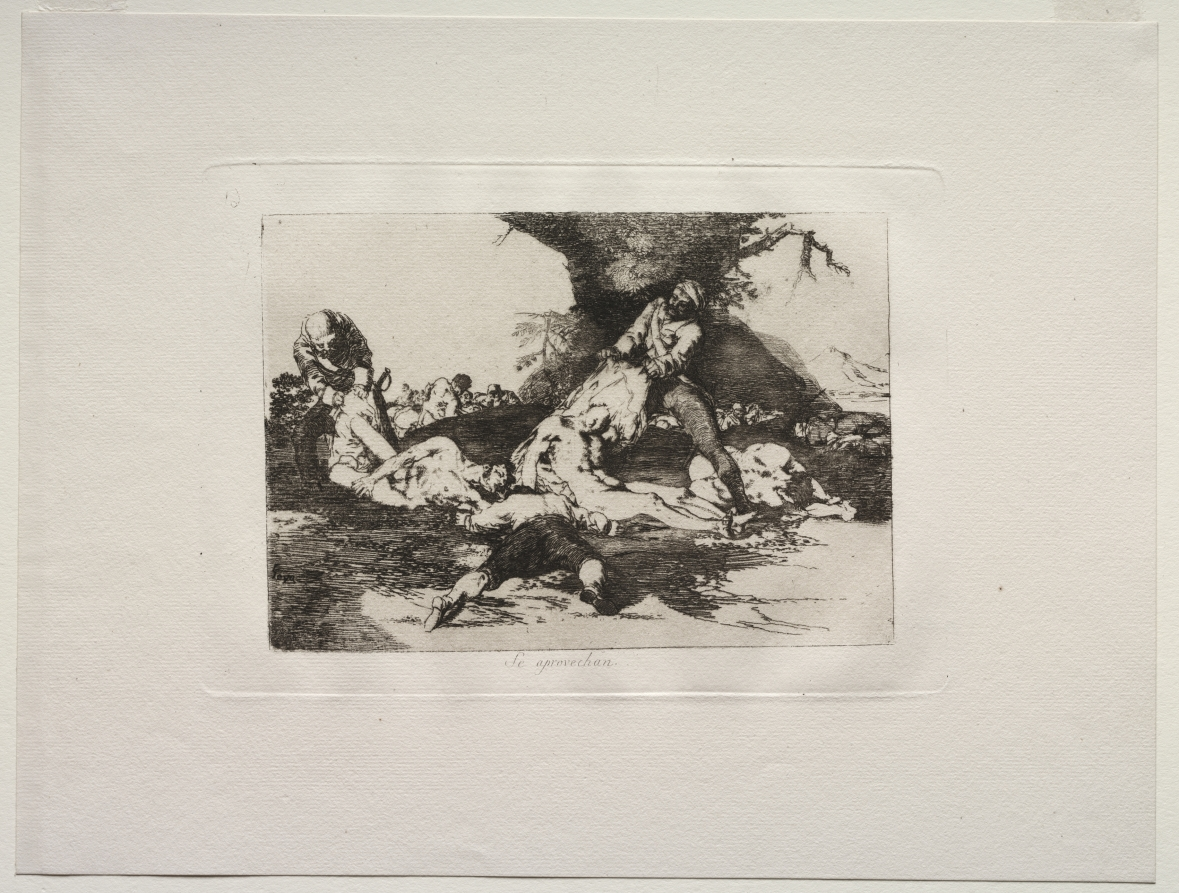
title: The Horrors of War: They Make Use of Them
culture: Spain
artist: Francisco de Goya (Spanish, 1746–1828)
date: c. 1810–20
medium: etching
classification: Print